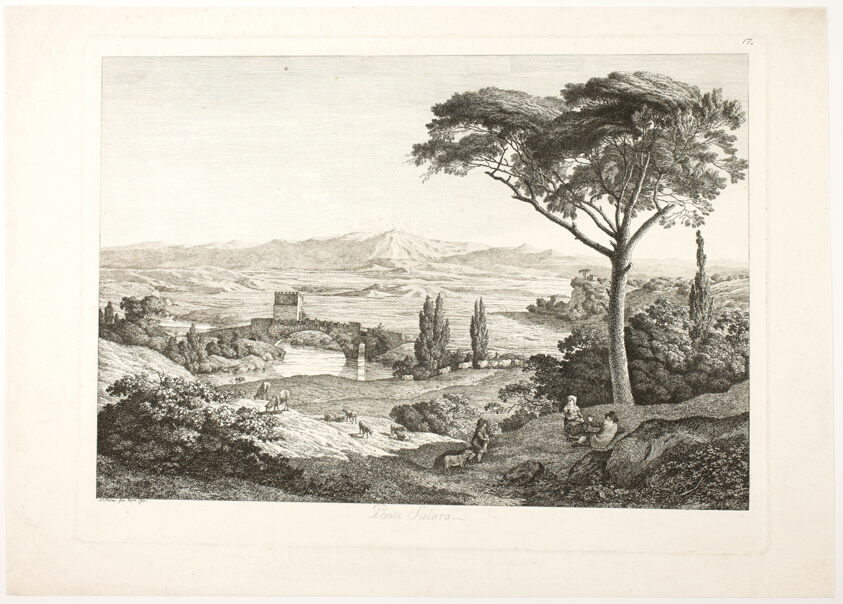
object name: Print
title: Bridge of Salaro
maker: Jacob Wilhelm Mechau (German, 1745-1808)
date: 1793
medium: Etching on paper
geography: Germany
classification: etching; print; prints and drawing